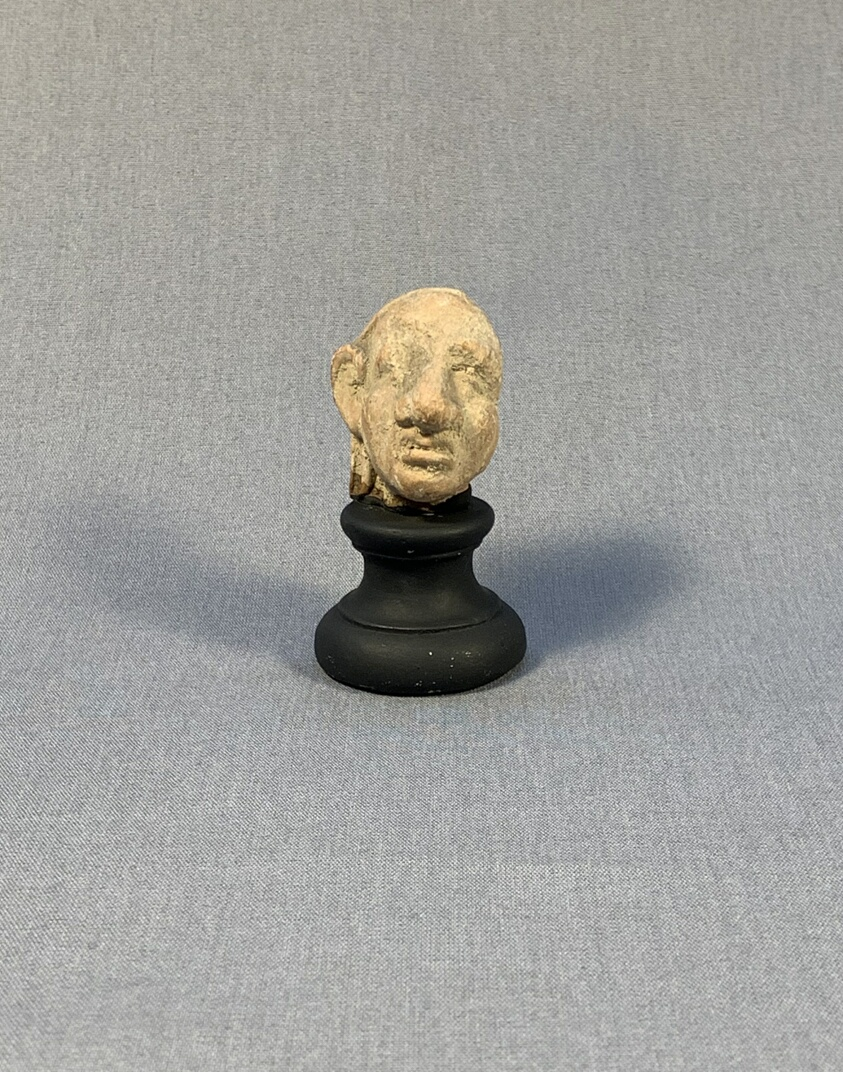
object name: Sculpture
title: Head of a Man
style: greek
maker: Greek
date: 2nd-1st century BCE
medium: terracotta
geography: Greece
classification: earthenware; ceramics; sculpture; ancient art